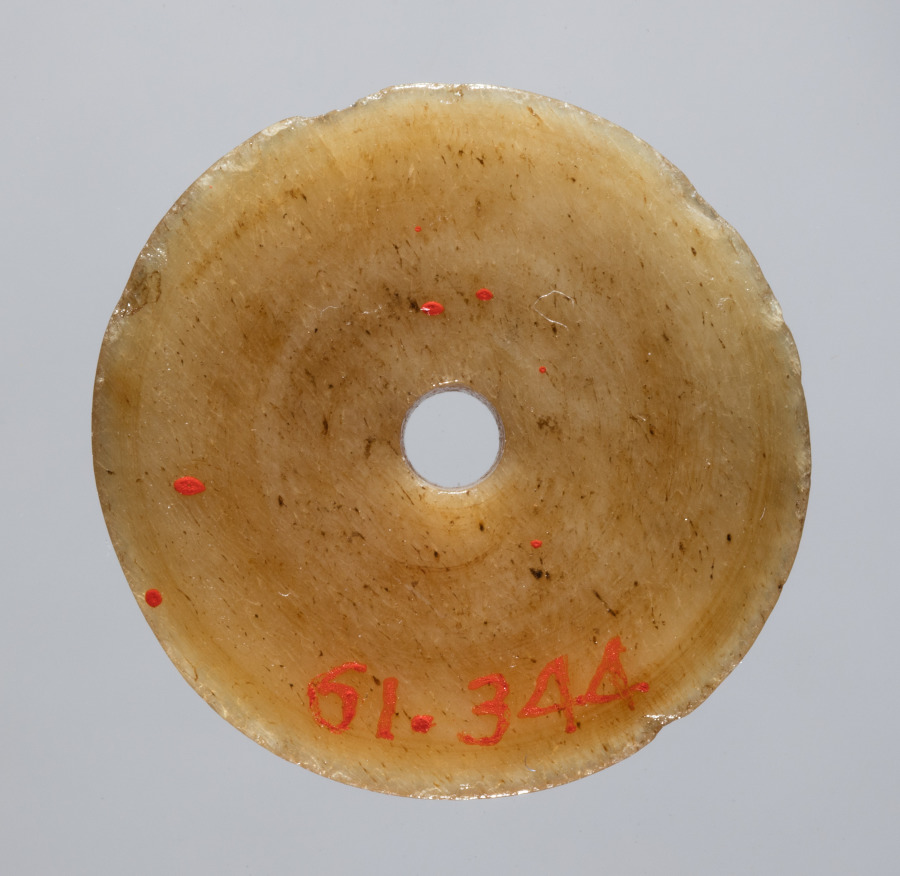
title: Spindle Whorl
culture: Iran, early Islamic period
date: 700s - 900s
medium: bone, incised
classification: Spindle Whorl